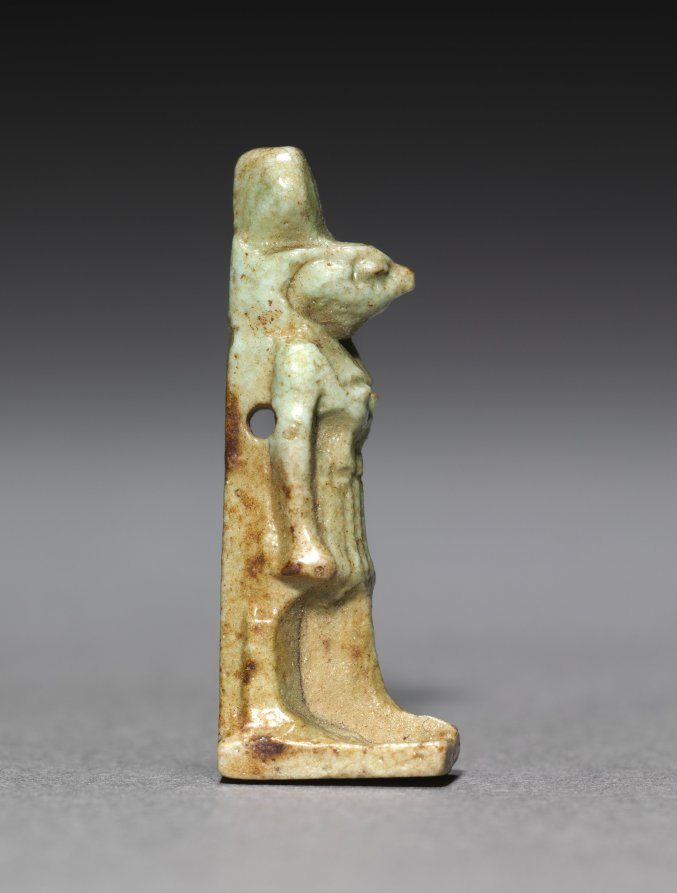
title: Amulet of Ra-Horakhty (?)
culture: Egypt, Late period (715–332 BCE), Dynasty 30–Greco-Roman period (332 BCE–395 CE), Ptolemaic dynasty (305–30 BCE)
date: 380–30 BCE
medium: gray green faience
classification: Amulets